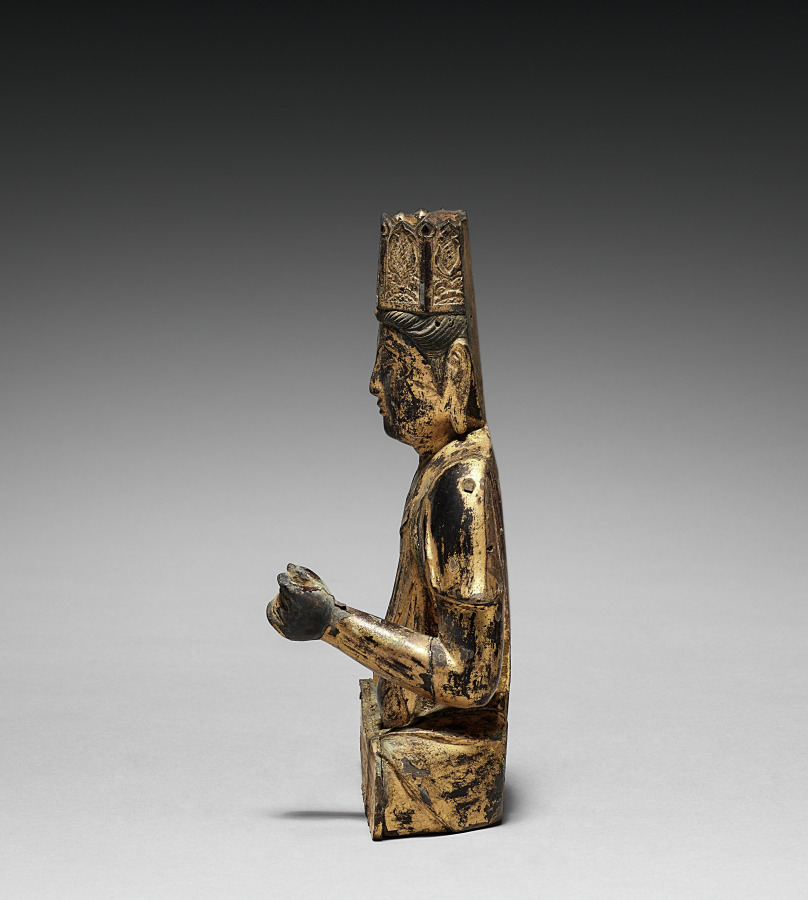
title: Bodhisattva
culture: Japan, Heian period (794–1185)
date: 900s–1100s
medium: gilded wood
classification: Sculpture